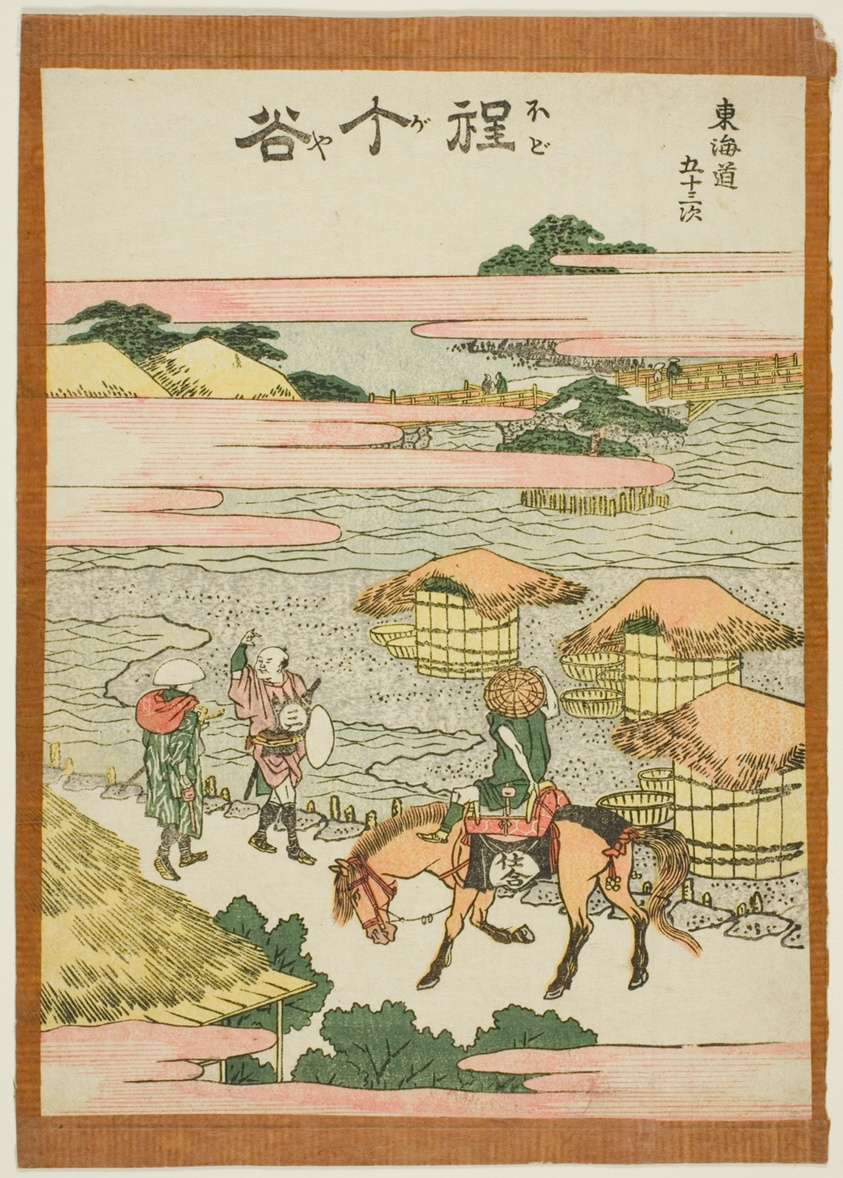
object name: Print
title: Hodogaya, from the series "Fifty-three Stations of the Tokaido (Tokaido gojusan tsugi)"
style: Japanese (culture or style)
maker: Katsushika Hokusai 葛飾 北斎; Japanese, 1760-1849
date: c. 1806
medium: Color woodblock print; chuban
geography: Japan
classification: woodblock print; print; asian art